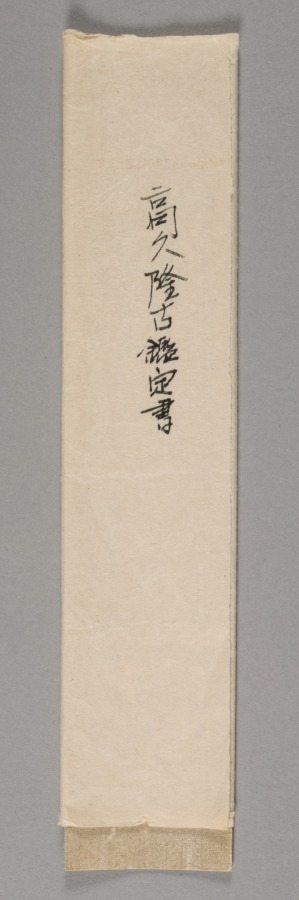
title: Landscape with Gentle Peaks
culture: Japan, Edo period (1615–1868)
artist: Kan Tenju (Japanese, 1727–1795)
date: 1767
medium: hanging scroll; ink and light color on paper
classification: Painting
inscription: 雨過嵐光煙／雲陽樹影諫／夕陽独在左／？卷讀残書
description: A figure sits in a retreat tucked into the mountains near a waterfall. The painter, Kan Tenju, was best known as a calligrapher and seal carver. Of Korean heritage, he was a patron of artist Ike Taiga (池大雅) (1723–1776), and a cousin of Taiga’s student Aoki Shukuya (青木 夙夜) (died 1802). His Chinese-style poem reads as follows: Smoky mist in the mountain reflects light after the rain, Sunlight passes through the clouds to cast shadows of the trees, Alone in the sunset, I read a well-worn book.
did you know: This painting combines image and calligraphy, connected by skillful brushwork.